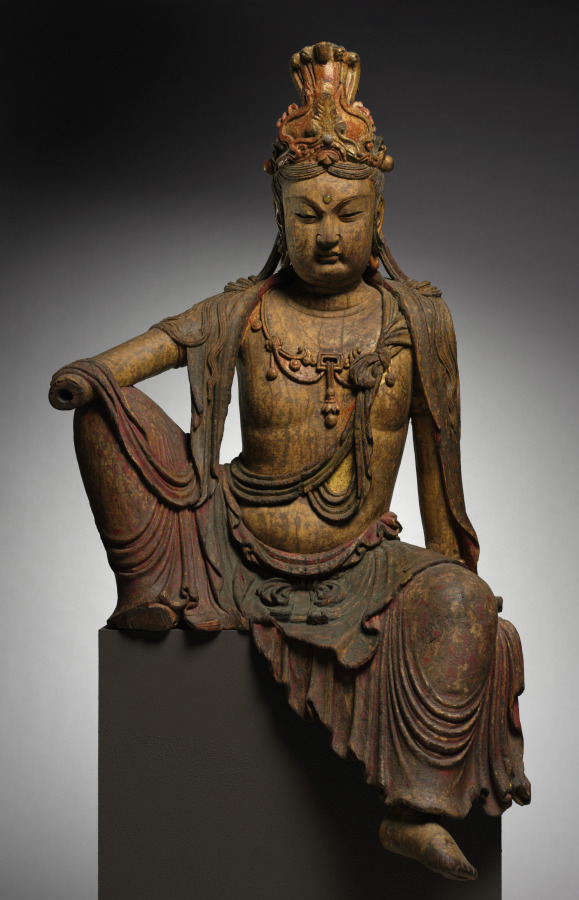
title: Seated Guanyin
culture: China, late Northern Song dynasty (960-1127) - Jin dynasty (1115-1234)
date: late 1100s–1200s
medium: wood with polychromy and gilding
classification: Sculpture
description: The South Sea Guanyin was originally seated on a rocky throne to represent the shore of his home in the mythical island of Potala. His right leg is raised, the arm resting on the folded knee in a relaxed position. With an expression of grace, calmness, and compassion, the Guanyin is especially appealing as the "guide of souls" who offers hope for salvation.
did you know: After acquisition, the CMA conservator meticulously used surgical knives and etching tools to uncover the sculpture's original polychromy and gilding, hidden beneath layers of protective varnish and paint.